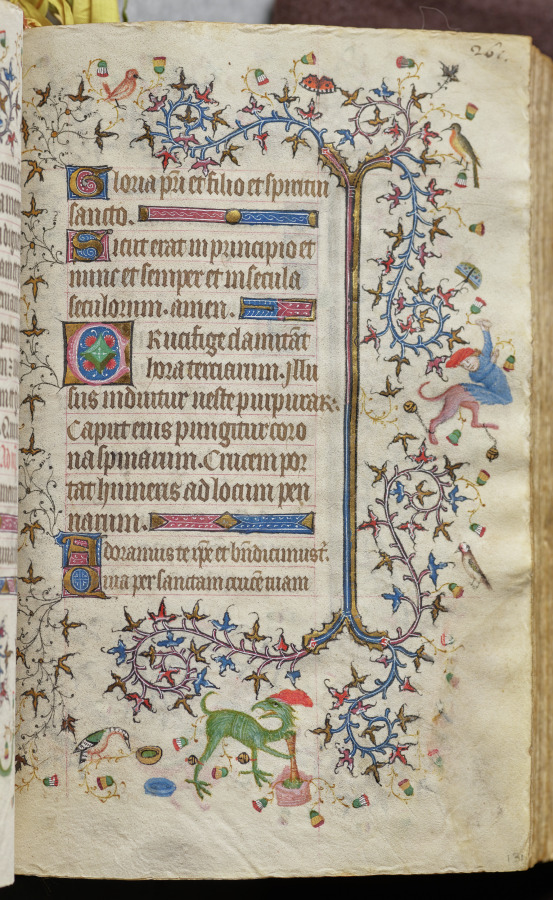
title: Hours of Charles the Noble, King of Navarre (1361-1425): fol. 131r, Text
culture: France, Paris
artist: Master of the Brussels Initials and Associates (French)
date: c. 1405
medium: ink, tempera, and gold on vellum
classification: Bound Volume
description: This precious volume was obviously highly prized by its owner, the French-born King of Navarre, who had his coat of arms painted on no less than twenty folios. Rather than directly commissioning this manuscript from a specific workshop, it seems that Charles the Noble acquired his book of hours -- perhaps ready-made for the luxury market -- while on a trip to Paris in 1404-05. A collaborative effort, six painting styles are evidenced within the pages of this codex, those of two Italians, two Frenchmen, and two Netherlanders. The painter who was responsible for the planning and decoration of the book, and who produced seventeen of the large miniatures, was a Bolognese artist known as the Master of the Brussels Initials. His principal assistant, responsible for most of the borders, was a Florentine who signed his name "Zecho" da Firenze on folio 208 verso.